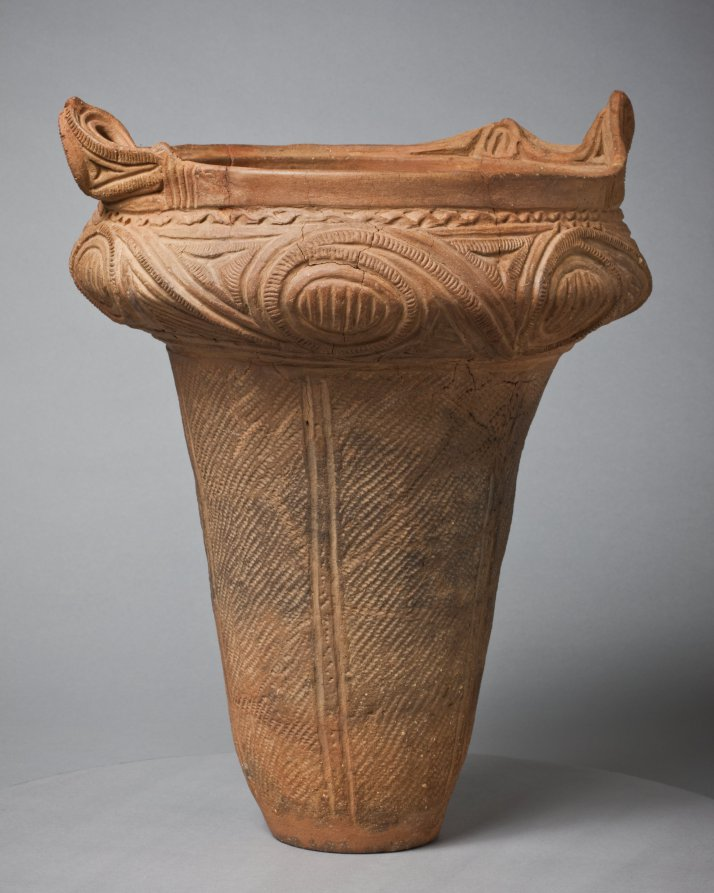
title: Urn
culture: Japan, Jōmon period (c. 10,500–300 BCE)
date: c. 2000 BCE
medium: earthenware, terracotta, impressed and incised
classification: Ceramic